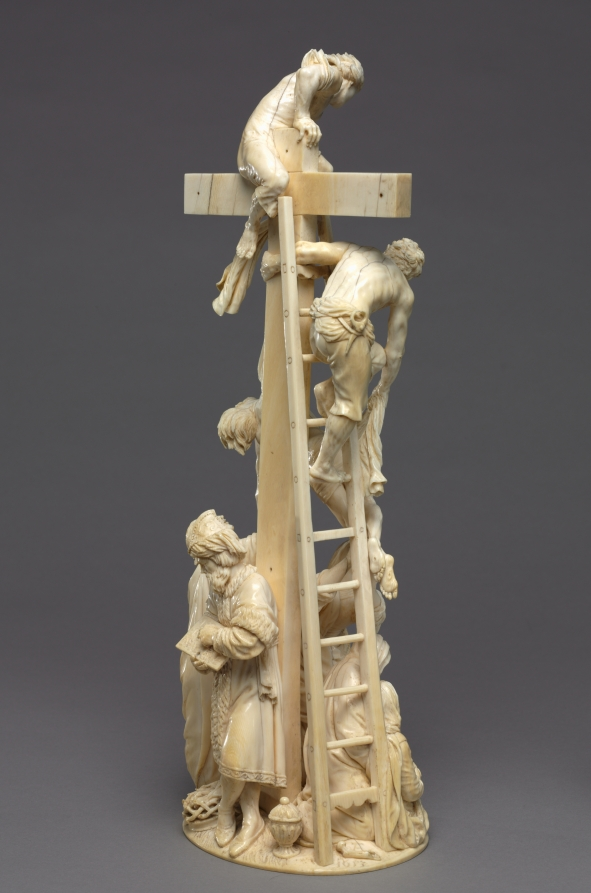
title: Descent from the Cross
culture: Austria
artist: Adam Lenckhardt (German, 1610–1661)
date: 1653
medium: ivory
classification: Sculpture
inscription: inscribed with monogram "AL" conjoined and dated 1653.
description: Carved from a single piece of ivory for Prince Karl Eusebius von Liechtenstein of Vienna, this work is a true tour-de-force. It took Lenckhardt seven years to complete; it is his last known sculpture and the pinnacle of his career. The biblical accounts of the descent from the cross found in the gospels are not consistent, which may contribute to the difficulty in precisely identifying the figures. The Virgin Mary, Saint John, Mary Magdalene, and others were said to be present, but undoubtedly there are other disciples here mourning Christ’s death. The intense emotion registers on the faces of the figures in the scrupulous and exquisitely detailed work.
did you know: Carved from a single elephant tusk, the artist took special care to ensure the ivory did not crack or break as he meticulously crafted each figure in this visually exciting sculpture. Look closely to find tools and small objects included near its base.